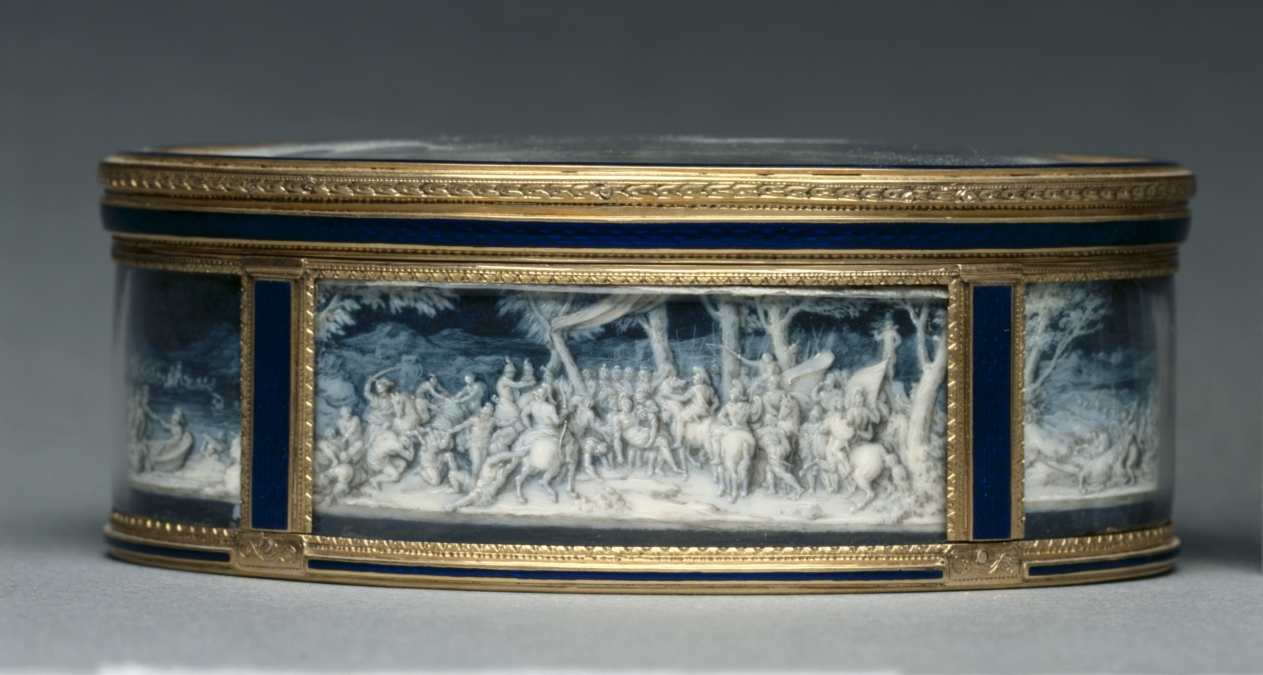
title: Snuff Box (Tabatière)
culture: France, 18th century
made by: Pierre Marie Gault De Saint-Germain (French, 1754–1842)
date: 1779–80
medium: gold and enamel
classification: Miscellaneous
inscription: [Warden's mark for Paris, 1779-1780, inside bottom; inside cover]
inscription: [Illegible maker's mark, inside bottom; inside cover]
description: Decorated with images derived from ancient Greek and Roman history in the style of cameos, intricately carved gemstones, this box evokes the rising neoclassical imagery in France. The scenes on the box recount several key events in the life of Alexander the Great. The enameled works were inspired by a series of prints by Sébastien Leclerc which drew from a series of paintings by Charles Le Brun.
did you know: The original series painted by Charles Le Brun, The Battles of Alexander (Les Batailles d’Alexandre) (1600s), was commissioned by King Louis XIV of France.